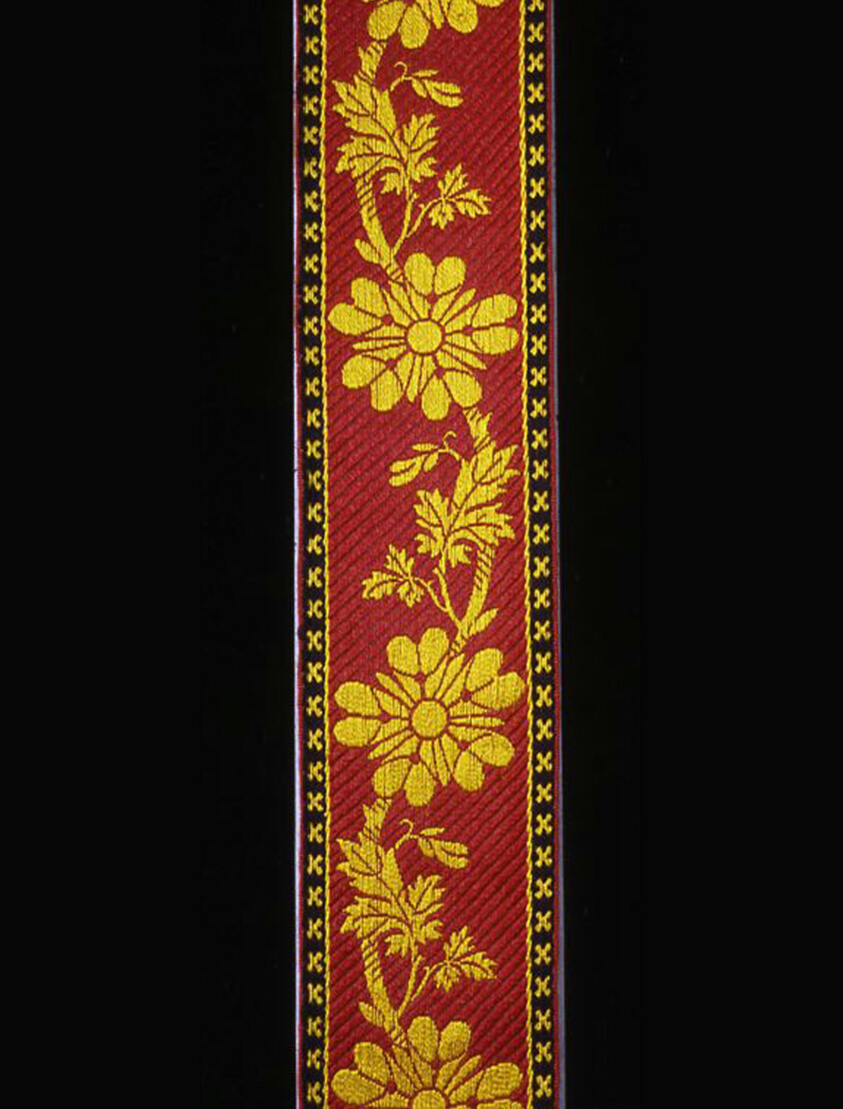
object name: Textile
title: Border or Ribbon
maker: France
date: c. 1830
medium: Silk and cotton, two-faced, two-color complementary warp weave of warp-float faced twill weave with areas of complementary warp-floats and of warp-float faced twill weave with areas of twill weave, both with stripes of two color complementary warp weave; woven on a loom with Jacquard attachment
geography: France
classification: textile; weaving